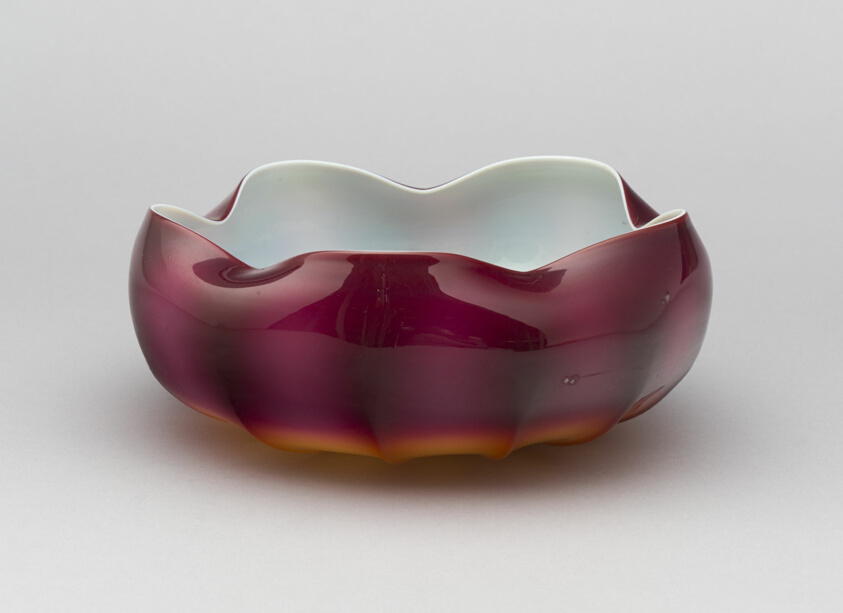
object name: Glass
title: Bowl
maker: New England Glass Co.; American, 1818–1888; Cambridge, Massachusetts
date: c. 1886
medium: Glass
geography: East Cambridge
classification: bowl; glass; american decorative arts; american arts; decorative arts